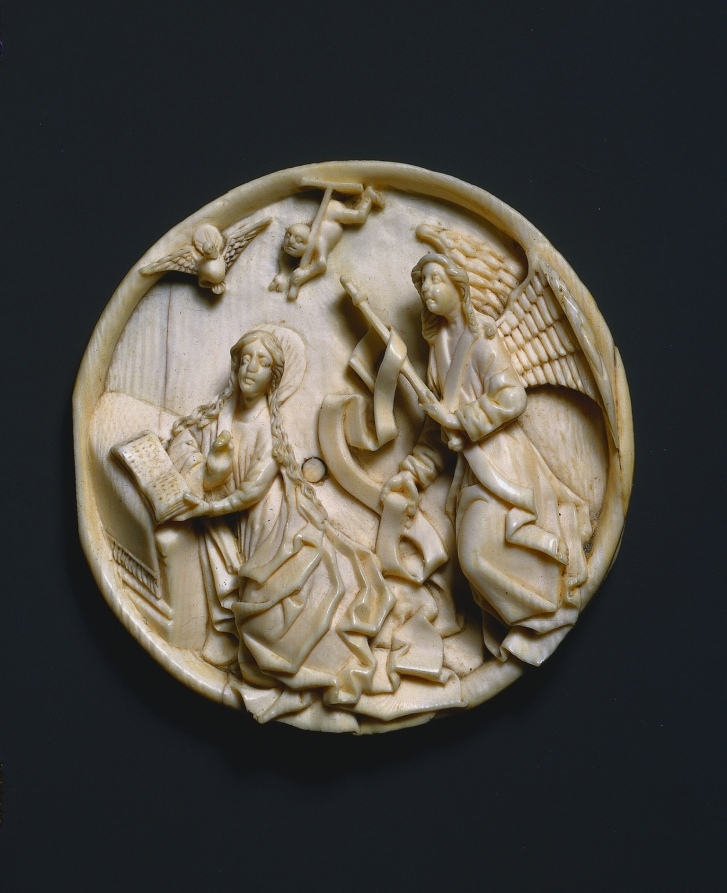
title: Roundel with the Annunciation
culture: Germany, Upper Rhine, 15th century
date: c. 1470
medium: ivory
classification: Ivory